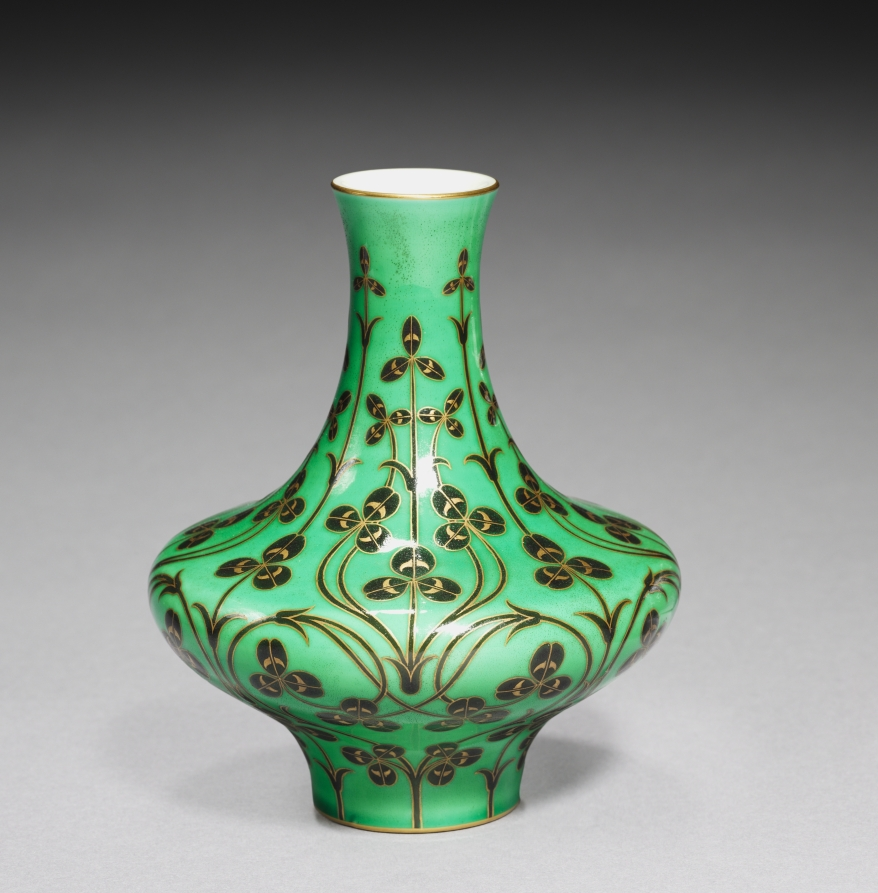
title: Vase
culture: France, Sèvres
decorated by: Henri-Louis-Laurent Ulrich (French)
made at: Sèvres Porcelain Factory (French, est. 1756)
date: 1897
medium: porcelain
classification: Ceramic